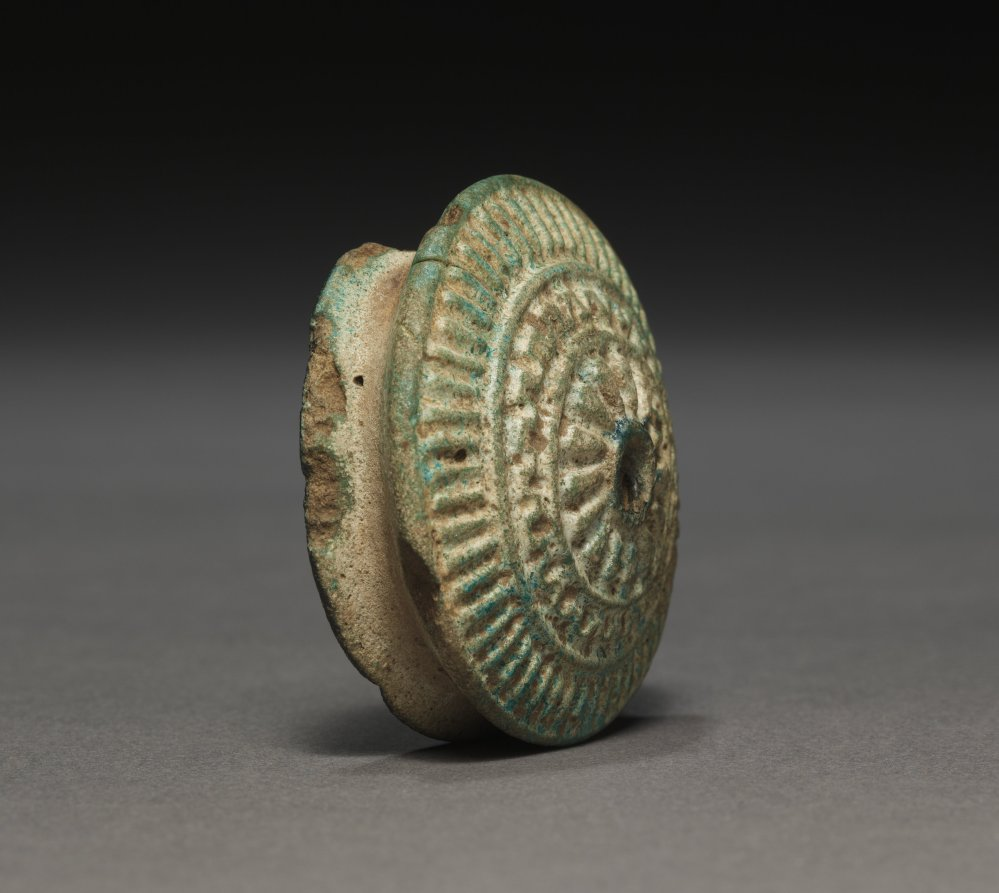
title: Ear Stud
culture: Egypt, New Kingdom (1540–1069 BCE), Dynasty 18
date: 1540–1069 BCE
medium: turquoise faience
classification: Amulets